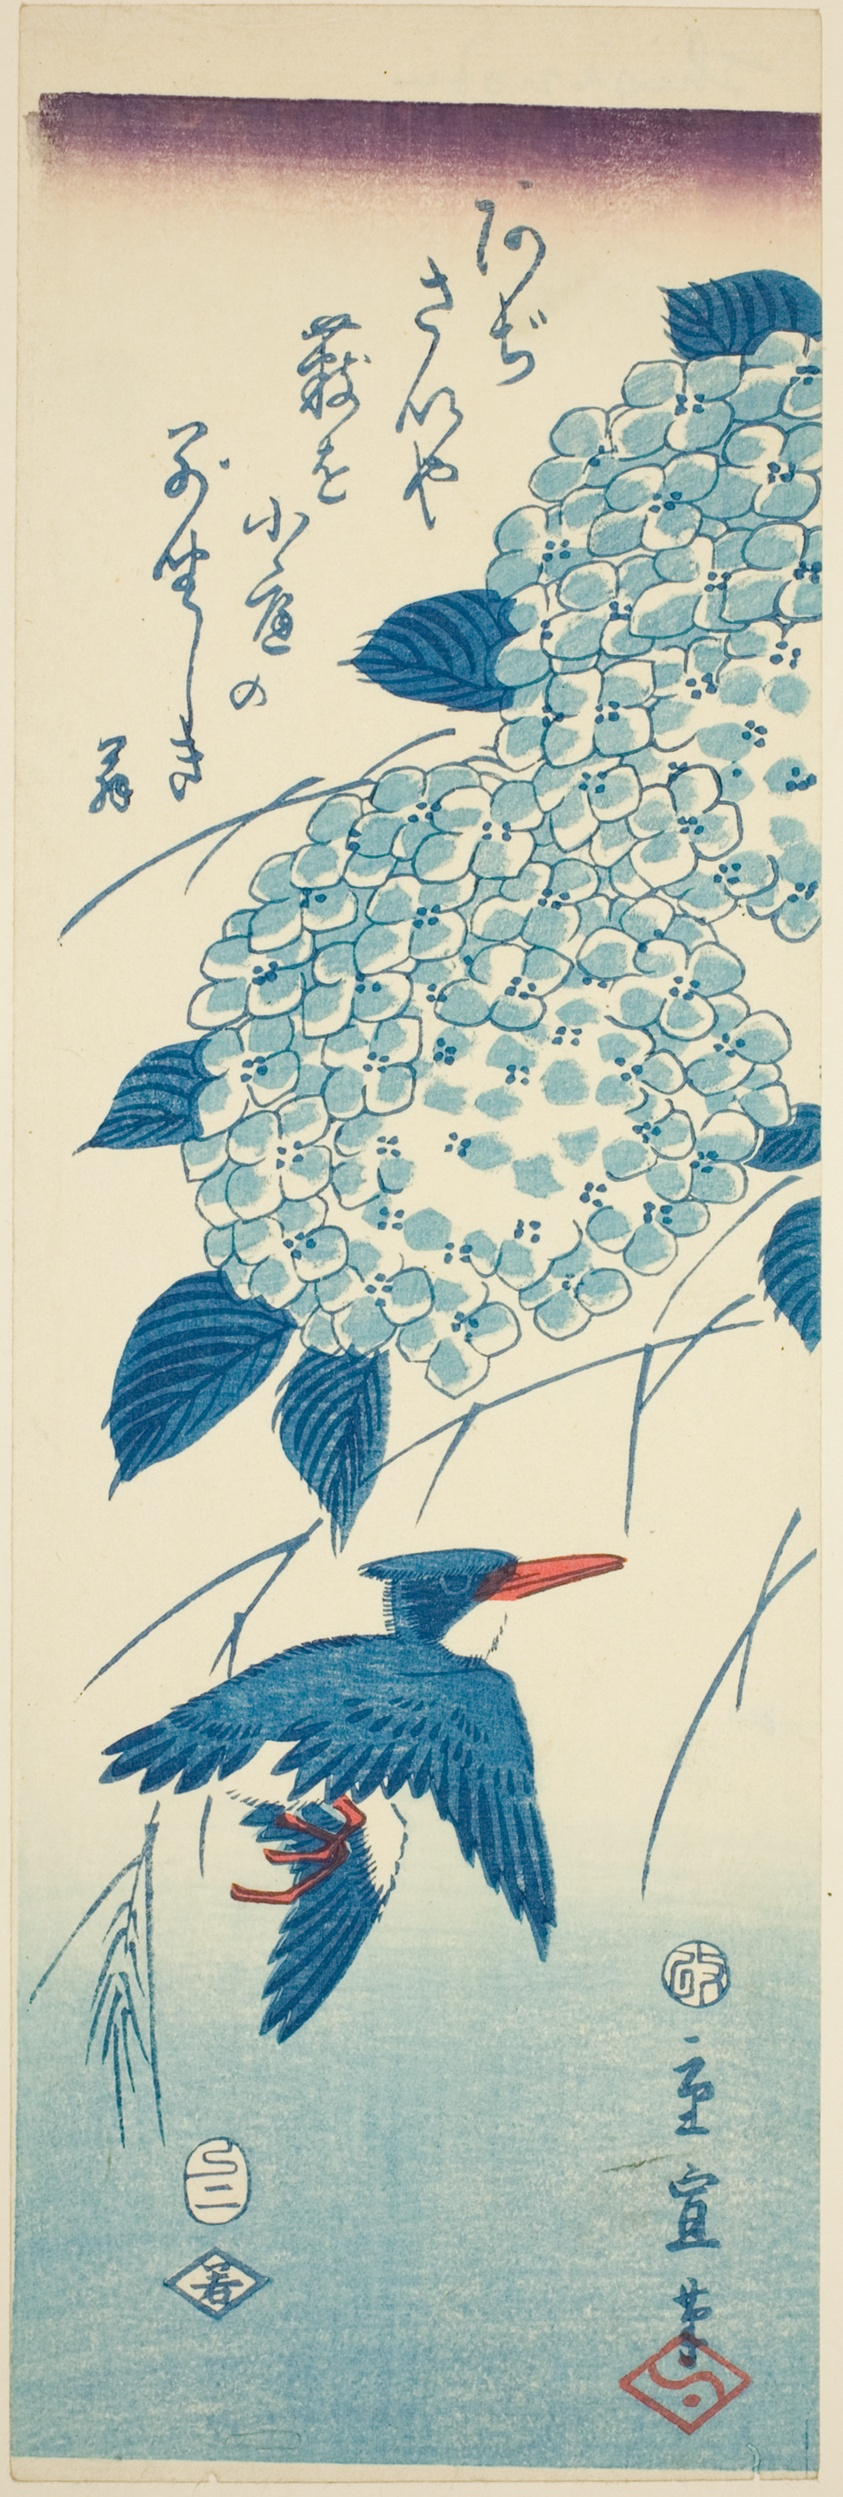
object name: Print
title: Kingfisher and hydrangea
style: Japanese (culture or style)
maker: Utagawa Hiroshige II (Shigenobu) (Japanese, 1826–1869)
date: 1857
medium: Color woodblock print; chutanzaku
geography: Japan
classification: woodblock print; print; asian art